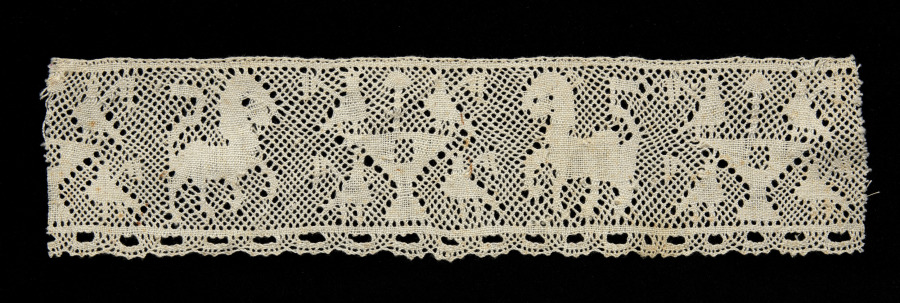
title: Lace Insertion and Edging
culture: Italy, Abruzzi, Pescocostanzo(?)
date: 1600s–1700s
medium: Bobbin lace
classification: Lace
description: This piece of lace, featuring doves and dromedaries, was created without a model and "a tutte coppie," meaning the ground and design was worked at the same time, rather than separately and then later combined.